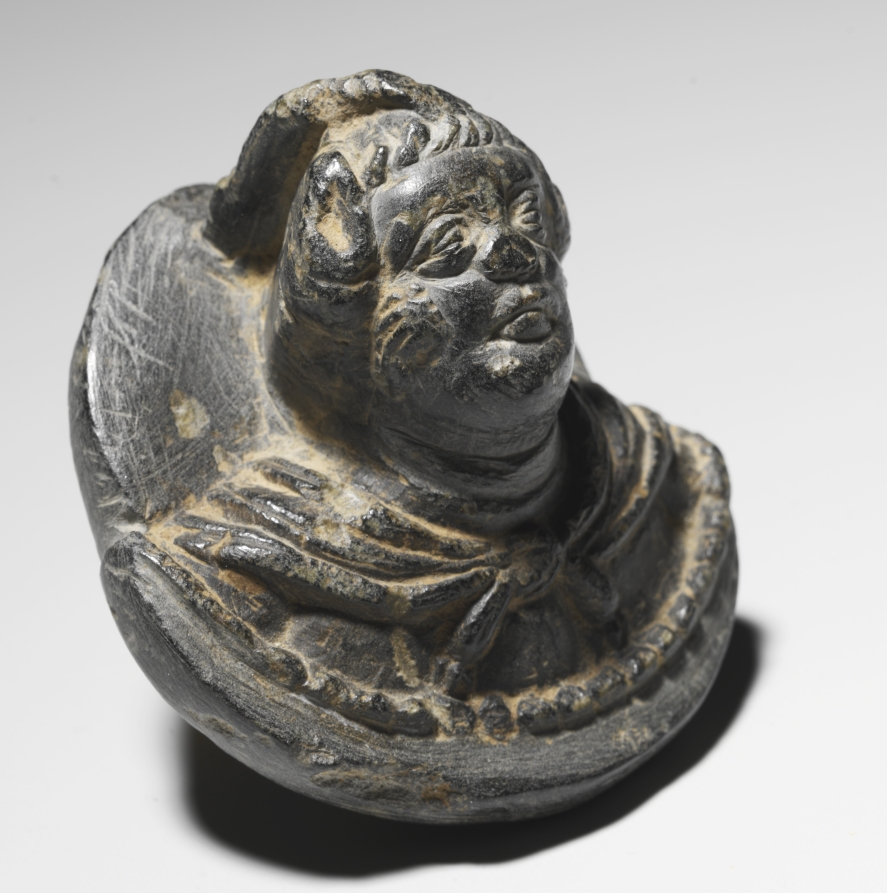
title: Plaque with a Male Head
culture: Pakistan, Gandhara, Kushan period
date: 100s CE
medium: gray schist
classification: Sculpture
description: This small schist plaque is decorated with the bust of a man. It may have been used in several different ways—for example, like the roundels with highly projecting heads that have been reproduced by Marshall as door knockers, reverse sides of hand mirrors, and so on. Although they are made of bronze, this does not preclude that this schist plaque may have been set in a metal mount. There is also a precedence for objects of this type among the Begram plaster emblemata and terracottas, which may have served for making molds in clay, from which the metal sculpture was then made. There is even a chance that the object may have been used as a lid on a vessel and that the projecting head of the image would serve as a handle. The bust is that of a middle-aged man with his hair pulled up in a chignon. His broad face reveals the somewhat pudgy, coarse features of a well-to-do individual. He wears a scarf around his neck, tied in a knot with loosely hanging ends, the same as one finds on some sculptures of attendants of Buddha in Mathura. This seems to imply either a secular personage or possibly a Bodhisattva. The bottom edge of the bust is decorated with a bead pattern.